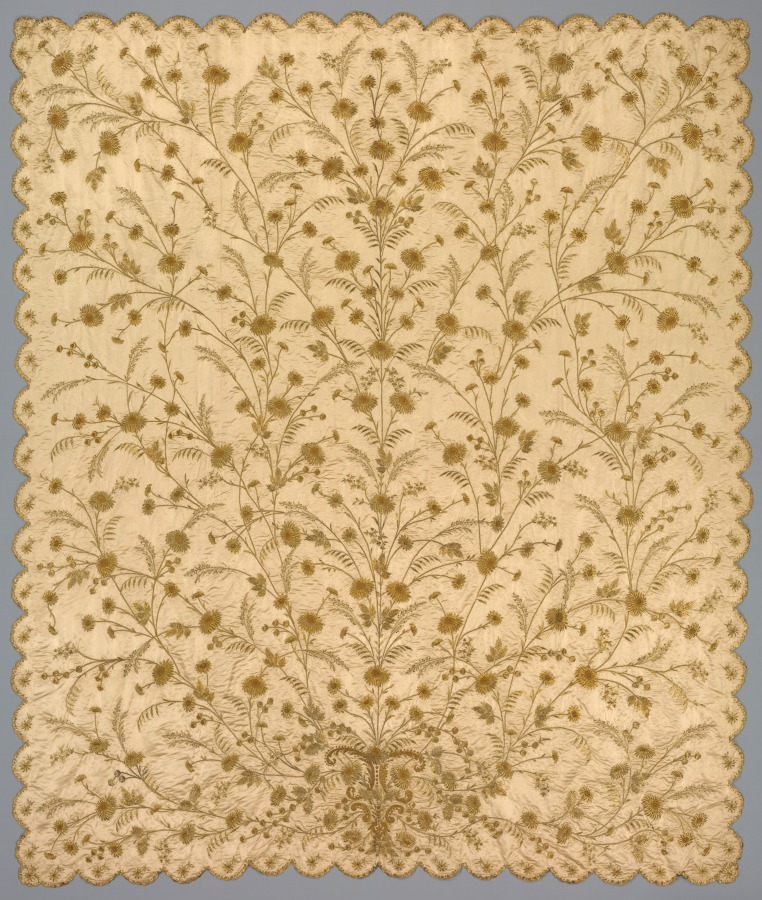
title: Canopy (?)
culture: France, 19th century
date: 1800s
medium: embroidery, silk and gold thread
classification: Embroidery